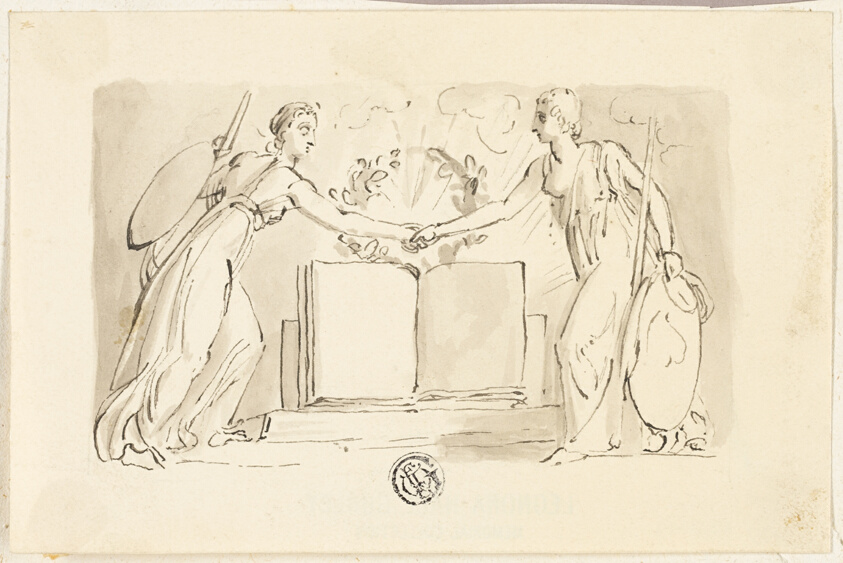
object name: Drawing and Watercolor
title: Two Allegorical Female Figures Clasping Hands before Book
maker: Attributed to Thomas Stothard; English, 1755-1834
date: 1830/34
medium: Pen and black ink with brush and gray wash, on cream wove paper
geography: England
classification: pen and ink drawings; drawings (visual works); prints and drawing